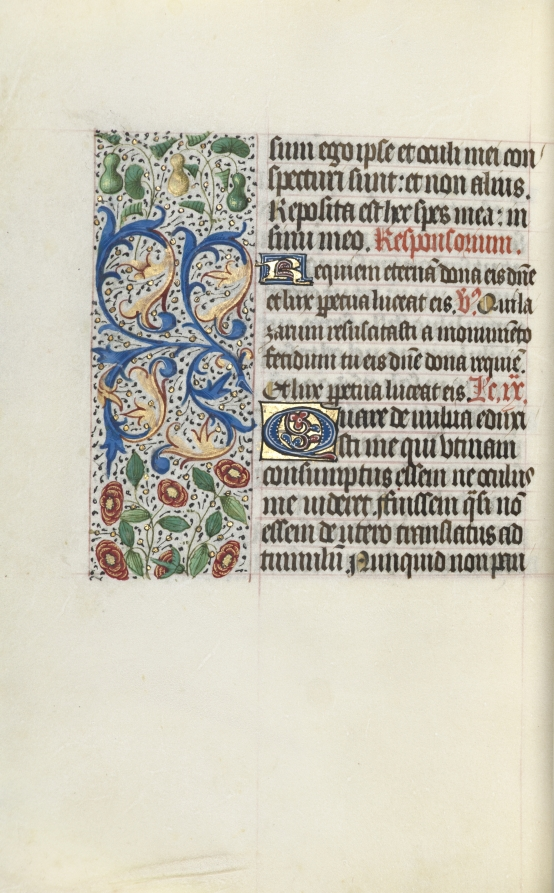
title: Book of Hours (Use of Rouen): fol. 132v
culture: France, Rouen, 15th century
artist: Master of the Geneva Latini (French, active Rouen, 1460–80)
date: c. 1470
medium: ink, tempera, and gold on vellum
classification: Bound Volume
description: In the late 1400s and early 1500s Rouen was an established and important center of book production. The city’s cathedral had a wealthy chapter that spent large sums of money to commission books and to maintain its extensive library. The stationers and booksellers would have likely been concentrated in or near the cathedral precinct. This artist, named after a manuscript now in Geneva, was Rouen’s principal illuminator during the second half of the 1400s.